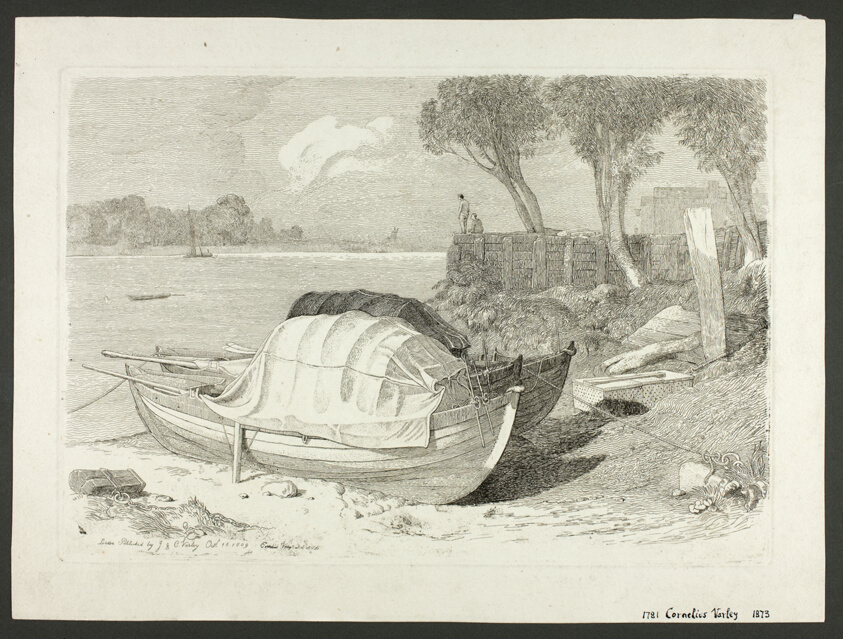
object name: Print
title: Shored Boats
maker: Cornelius Varley (English, 1781-1873); published by John Varley (English, 1778-1842) and Cornelius Varley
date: October 16, 1809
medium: Etching on off-white wove paper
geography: England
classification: etching; print; prints and drawing